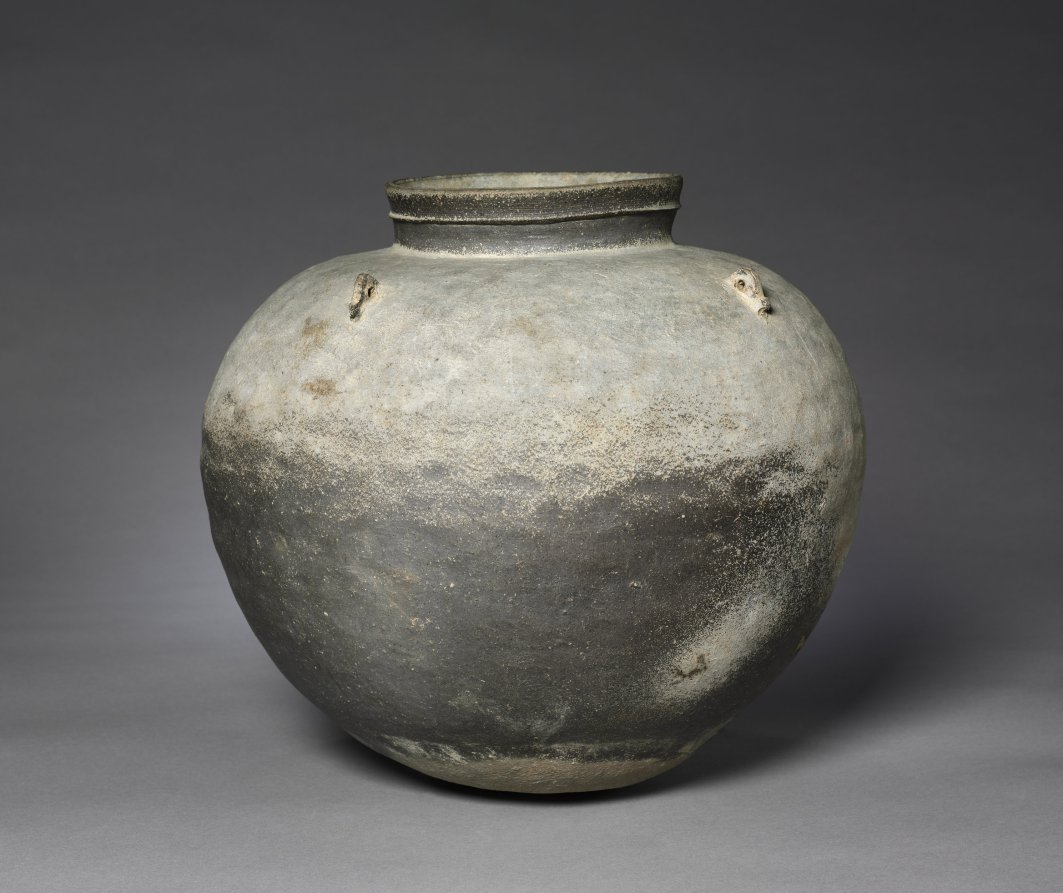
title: Jar with Four Lugs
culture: Korea, Three Kingdoms period (57 BCE–668 CE)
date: 500s–600s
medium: stoneware with traces of ash glaze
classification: Ceramic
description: This storage jar comes from the Paekche kilns. The matte gray surface of ash deposits on the upper body provides an appealing decoration. Paekche potters often employed the pounding technique (tanal in Korean) to treat the surface, a method to strengthen the clay body.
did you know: Closed kilns built on hillsides became widely used for producing this type of pottery vessel in Korea during the Three Kingdoms period.